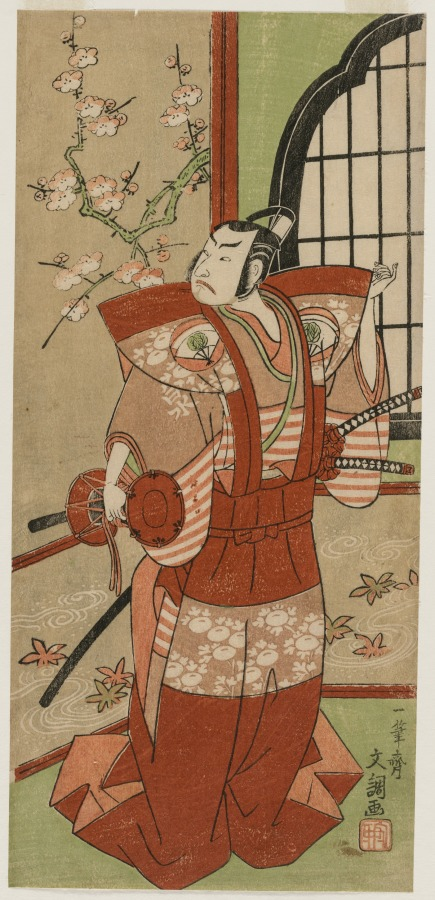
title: Onoe Kikugorō I as Izumi no Saburō in the Play Snowflakes: Plum Blossoms Kaomise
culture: Japan, Edo period (1615–1868)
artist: Ippitsusai Bunchō (Japanese, active c. 1765–92)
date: 1769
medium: color woodblock print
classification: Print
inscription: 落款 一筆文齊調画 守氏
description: The play Snowflakes: Plum Blossom Kaomise was performed at the Ichimura Theater in 1769.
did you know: The character's name, Izumi, appears on the right sleeve of the actor's robe.